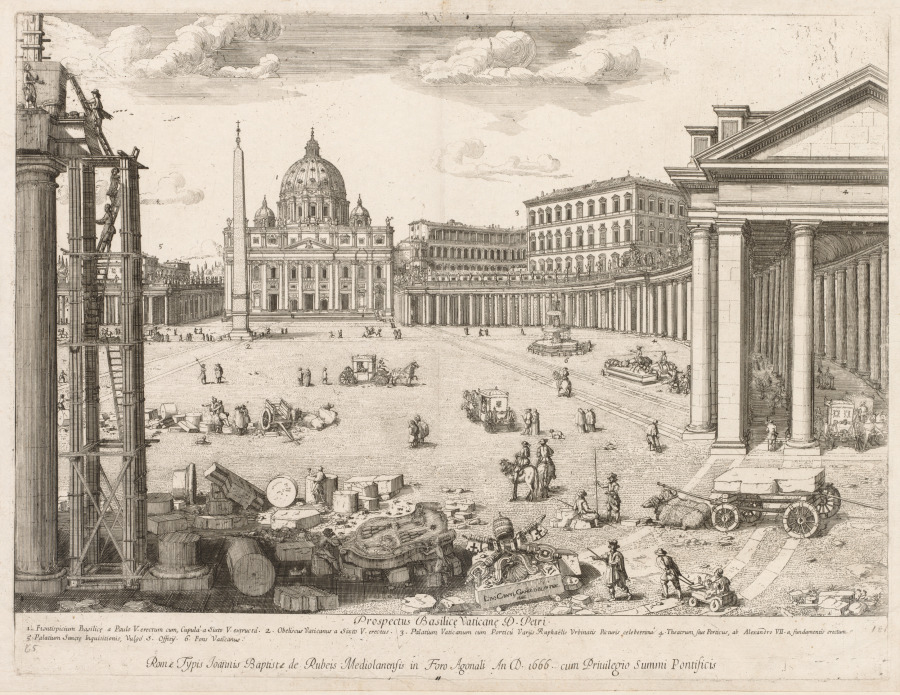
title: St. Peter's Basilica from "Prospectus Locurum Urbis Romae Insign[ium]"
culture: Flanders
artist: Lievin Cruyl (Flemish, c. 1640-c. 1720)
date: 1666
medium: etching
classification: Print